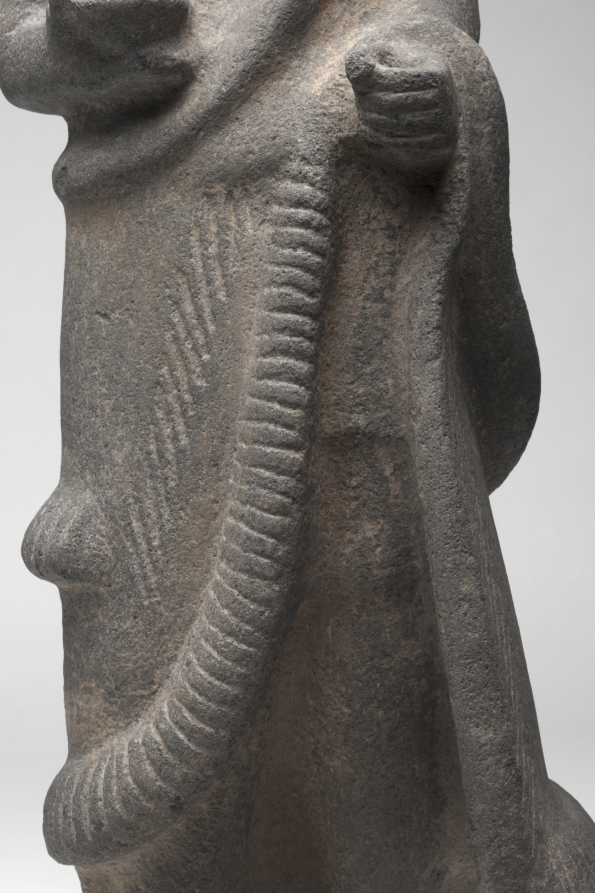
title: Priest-King or Deity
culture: Hittite, North Syria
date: c. 1600 BCE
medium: basalt with bone eyes (left, ancient; right, restored)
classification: Sculpture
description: The Hittites migrated into Anatolia in the 3rd millennium BCE and spoke an Indo-European language, a group that includes Greek, Latin, Persian, Sanskrit, English, and most modern European languages. They were the first ancient people to use iron for weapons. From about 1600–1200 BCE their empire was at its peak, extending from central Anatolia to Syria, and south along the eastern Mediterranean. Their vast empire and interest in commerce enabled the Hittites to spread Mesopotamian ideas and culture throughout the ancient Mediterranean world. This large basalt sculpture is exceptionally rare in depicting a Hittite god or priest-king wearing a horned conical crown, false beard, and long robe. He holds a bowl in his right hand and once held something in his left, perhaps a staff or sword.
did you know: The left eye of the sculpture is the original bone inlay while the right eye is a modern restoration done after the piece was damaged.